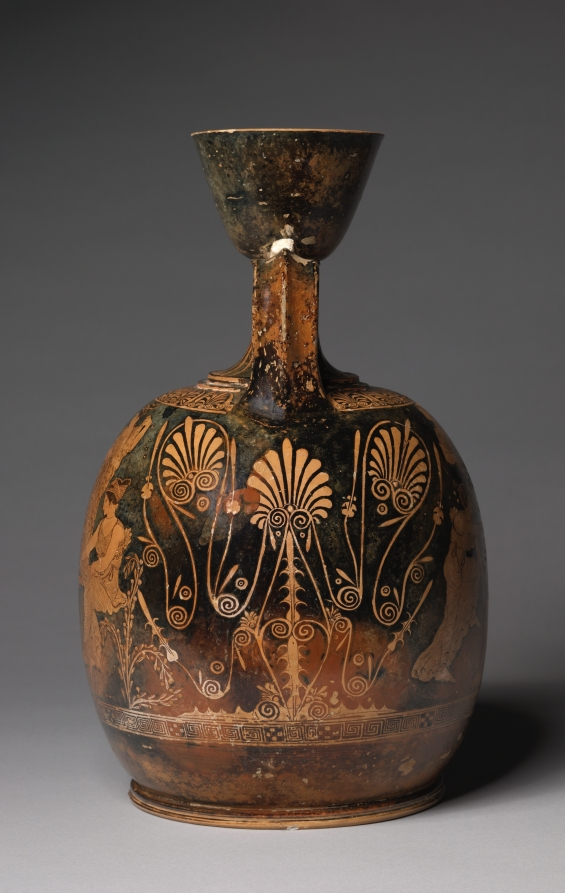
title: Red-Figure Squat Lekythos (Oil Vessel): Birth of Erichthonios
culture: Greek, Attic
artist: attributed to Meidias Painter (Greek, Attic, active c. 420–400 BCE)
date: c. 420–410 BCE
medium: ceramic, with gilding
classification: Ceramic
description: The central group on this vase shows the seated earth goddess Ge (also known as Gaia) handing her baby, Erichthonios, to Athena. Conceived from the seed of Hephaistos, Erichthonios would go on to become a king of Athens, and the story of his birth became popular in Athenian art of the fifth century BC. Other representations include Hephaistos as well as Kekrops, the mythical first king of Athens, sometimes together with Zeus and other deities. But this one includes only female onlookers—likely the three daughters of Kekrops watching from above, with Aphrodite and several abstract personifications such as Peitho (Persuasion) and Eudaimonia (Happiness) standing and seated nearby.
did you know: A lead rivet sits at the junction of handle and neck, probably an ancient repair.